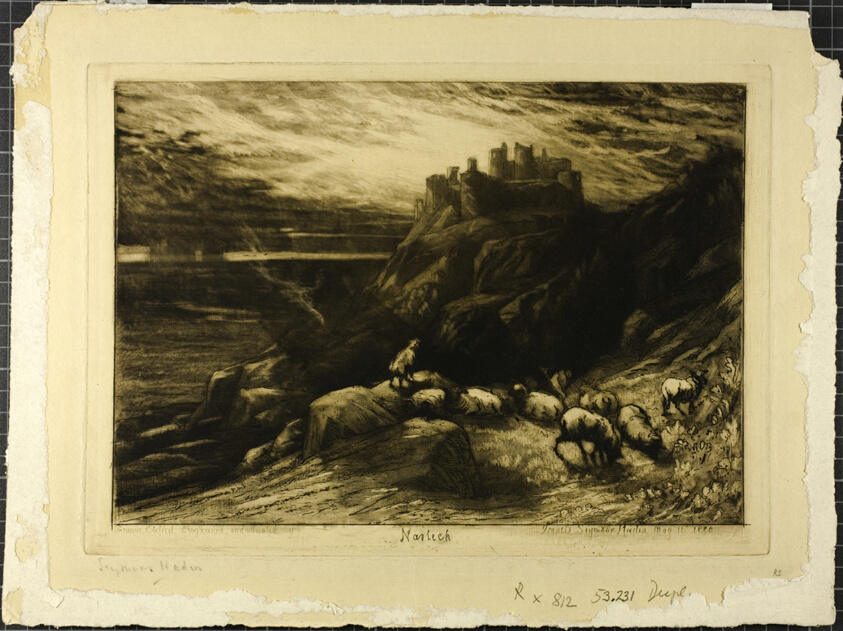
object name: Print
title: Harlech, No. II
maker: Francis Seymour Haden (English, 1818-1910)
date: May 11, 1880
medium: Mezzotint with etching and drypoint on copper printed on cream wove paper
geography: England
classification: etching; print; prints and drawing